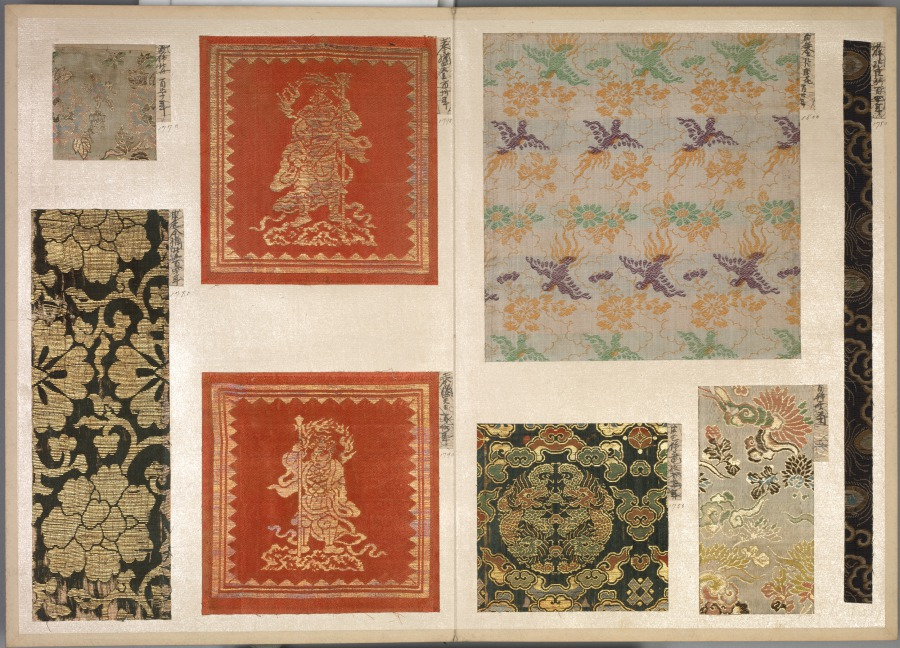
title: Album of Textile Samples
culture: Japan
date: 1790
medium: silk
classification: Textile